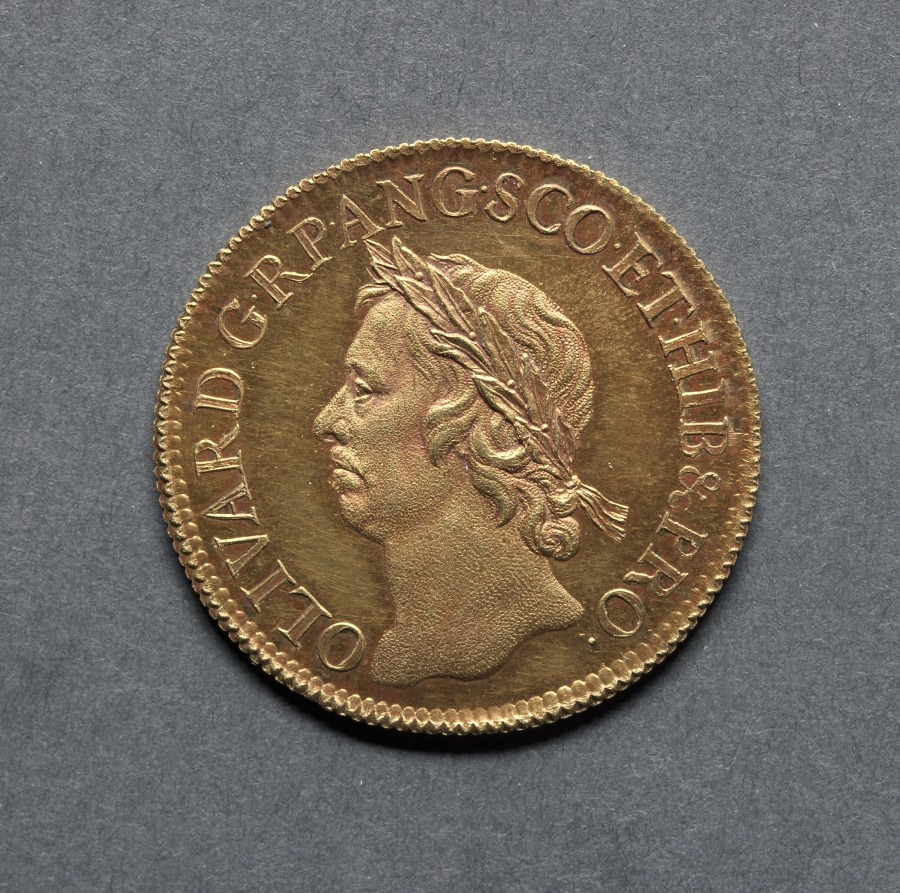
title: Broad: Oliver Cromwell Lord Protector (obverse); Crowned Shield of Arms (reverse)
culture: England, Oliver Cromwell, Lord Protector, 1653-1658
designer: Thomas Simon (British)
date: 1656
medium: gold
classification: Coins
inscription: PAX QVÆRITVR BELLO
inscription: OLIVARD G RP ANG SCO ET HIB&PRO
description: With the defeat of Charles I a Council of State was set up, the kingship abolished and England was governed as a Commonwealth. This rare piece was one of a series struck by order of Cromwell, and with the consent of the Council. The dies were made by Thomas Simon and the striking of the coins was entrusted to Peter Blondeau, who made use of the mill and screw press, which he had imported and improved. Public opinion appears to have been against Cromwell using his own portrait on the coinage and these pieces were not put into circulation, though even so they occasionally appear in somewhat worn condition. The laurel wreath and the crown are significant as there was a movement to offer Cromwell the Crown of England.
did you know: Thomas Simon was one of the great medallists of history and chief engraver at the Royal Mint although he left the regular work to his deputies and spent most of his time on commemorative medals.